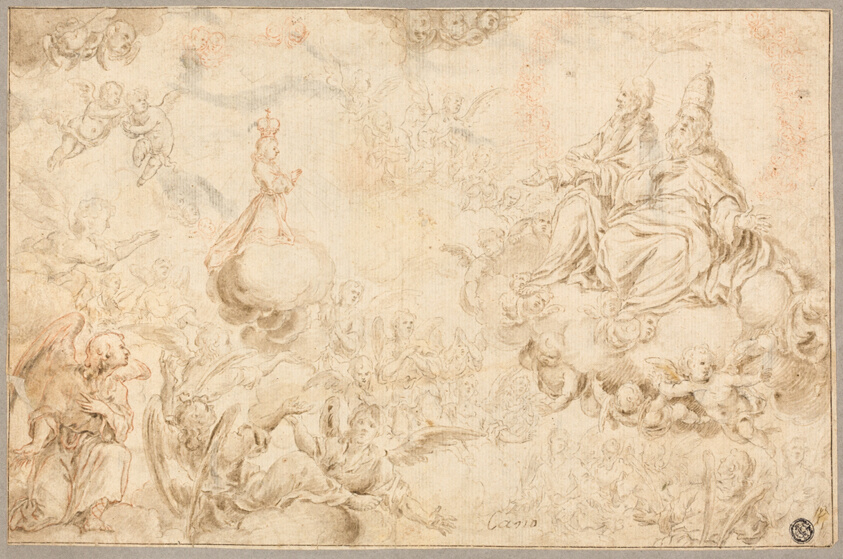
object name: Drawing and Watercolor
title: The Holy Infant Adoring the Trinity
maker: Attributed to Alonso Cano; Spanish, 1601-1667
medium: Pen and brown ink and red chalk and brush and brown and gray wash over black chalk, on ivory laid paper, laid down on gray wove card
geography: Spain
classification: pen and ink drawings; drawings (visual works); prints and drawing